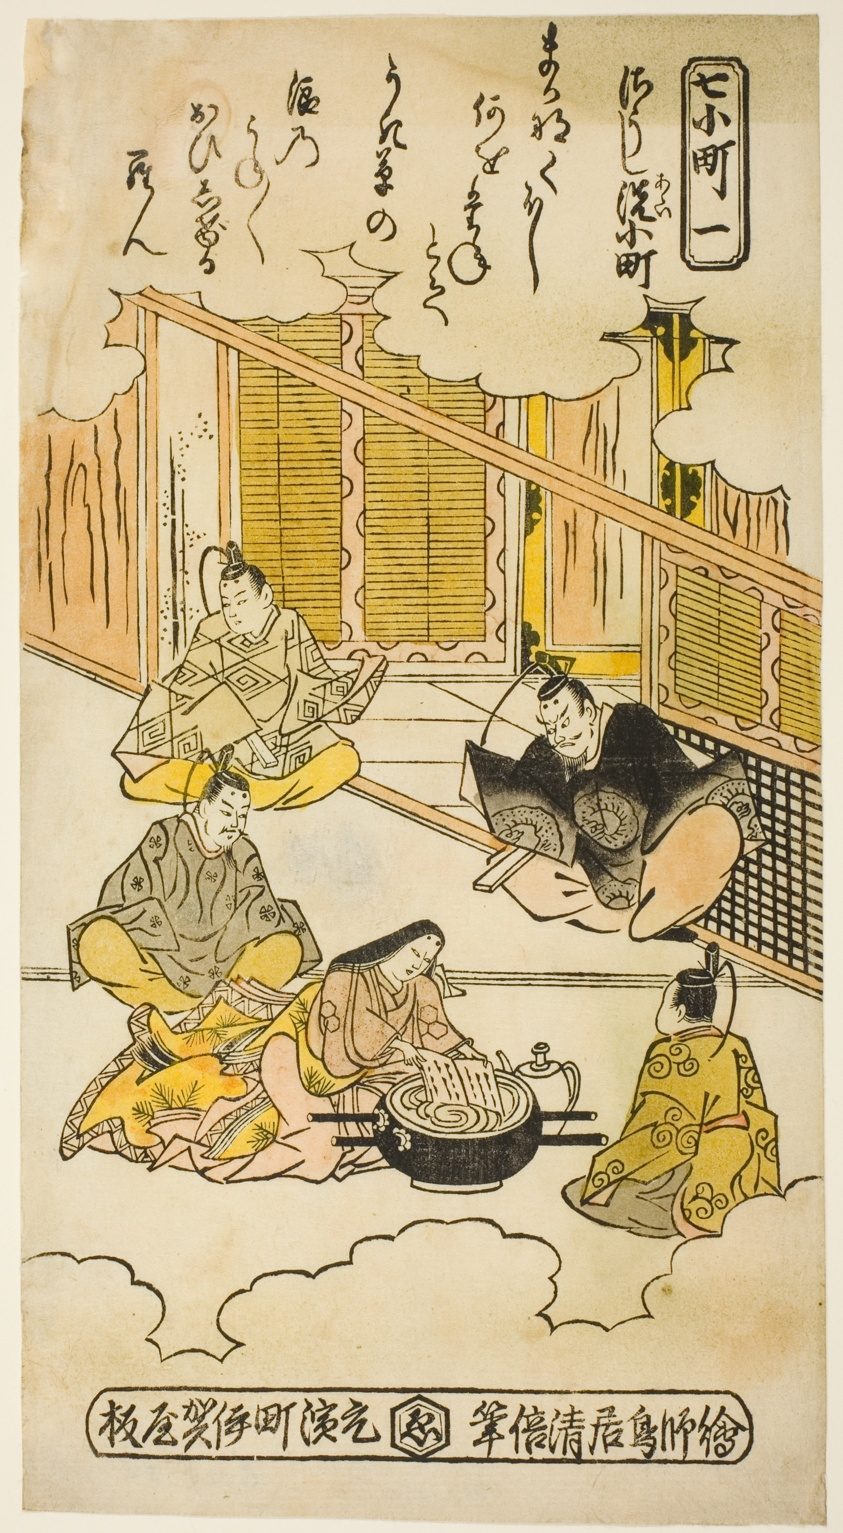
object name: Print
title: Ono no Komachi Washing the Copybook (Soshiarai Komachi)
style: Japanese (culture or style)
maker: Torii Kiyomasu II (Japanese, active early 18th century)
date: Edo period (1615–1868), 1735/40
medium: Hand-colored woodblock print; hosoban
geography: Japan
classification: woodblock print; print; asian art